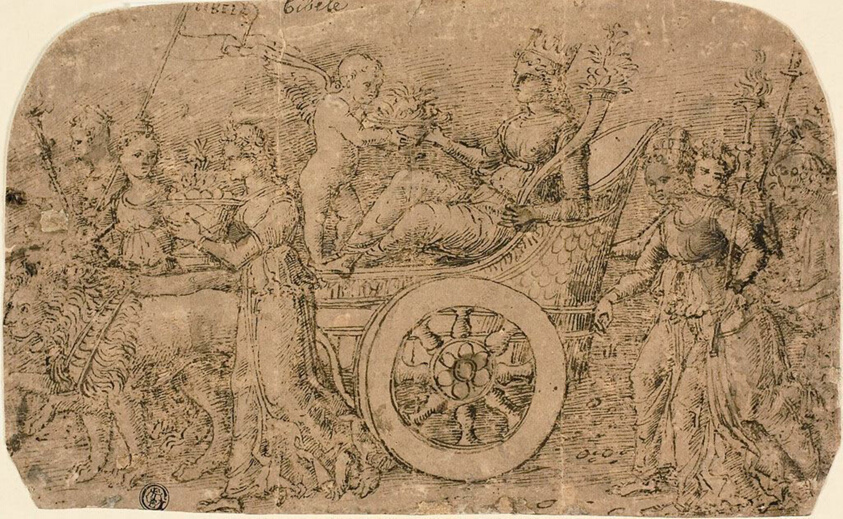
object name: Drawing and Watercolor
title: Triumph of Cybele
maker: Circle of Bernardino Parentino; Italian, c. 1437-1531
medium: Pen and brown ink on tan laid paper, laid down on buff laid paper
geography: Italy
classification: pen and ink drawings; drawings (visual works); prints and drawing